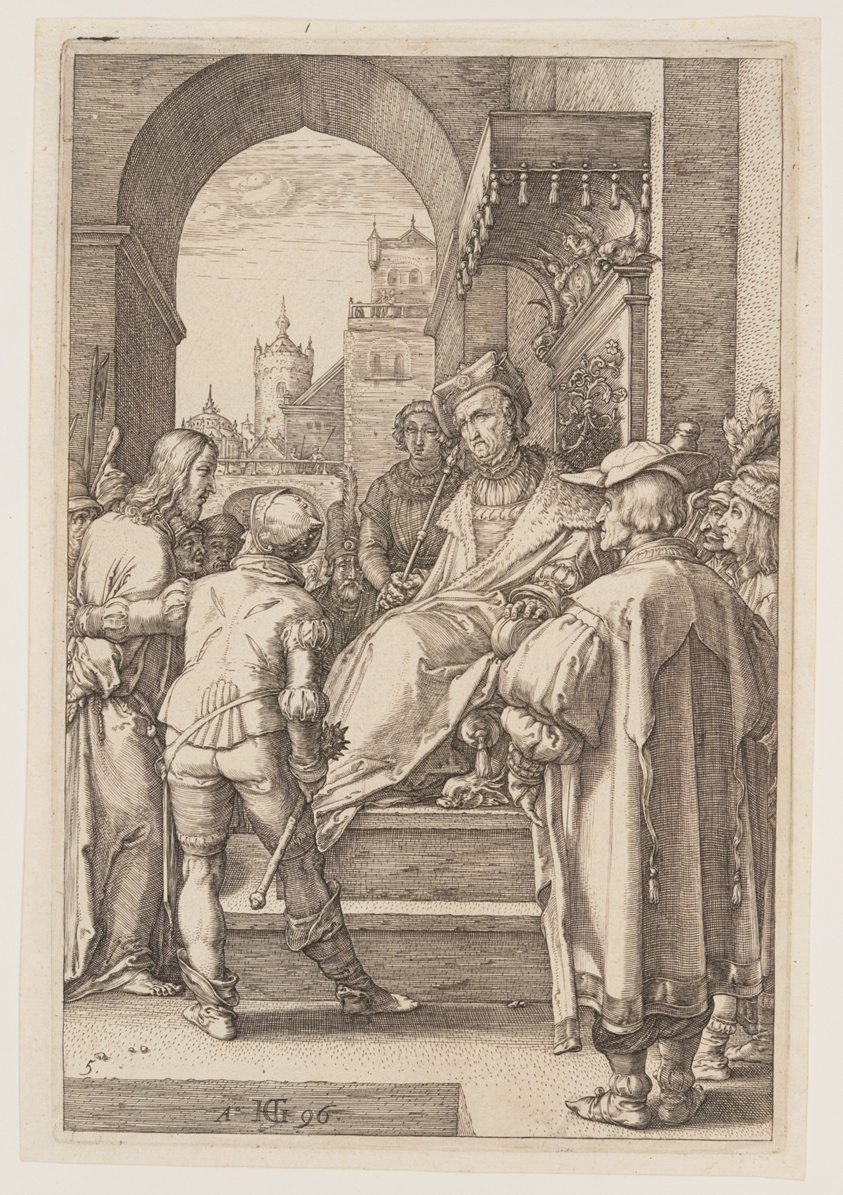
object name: Print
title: Christ before Pilate, from The Passion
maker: Hendrick Goltzius (Dutch, 1558–1617)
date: 1596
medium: Engraving on ivory laid paper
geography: Netherlands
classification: engraving; paper; print; prints and drawing